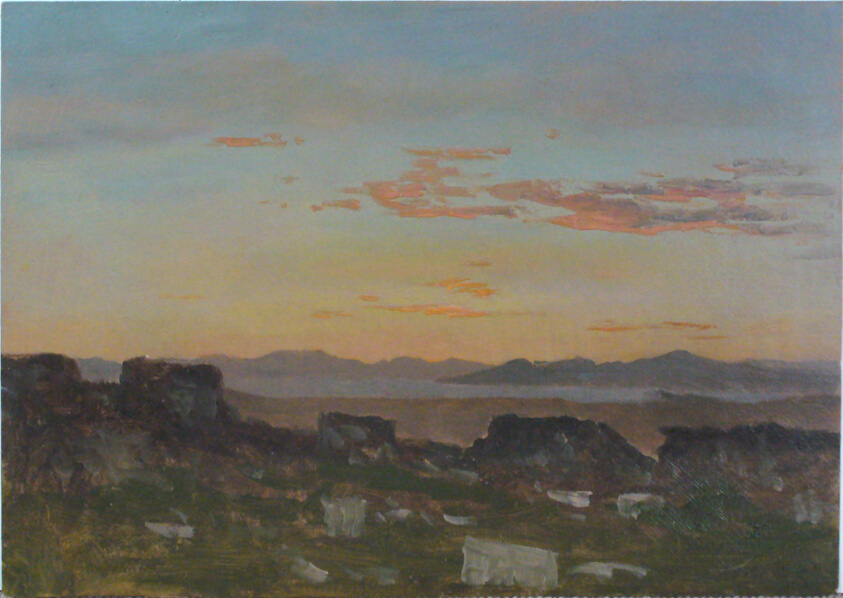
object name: Drawing and Watercolor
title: Orange Sky with Scattered Clouds, Greece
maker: Lockwood de Forest (American, 1850-1932)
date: February 22, 1878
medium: Oil on card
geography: United States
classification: drawings (visual works); prints and drawing